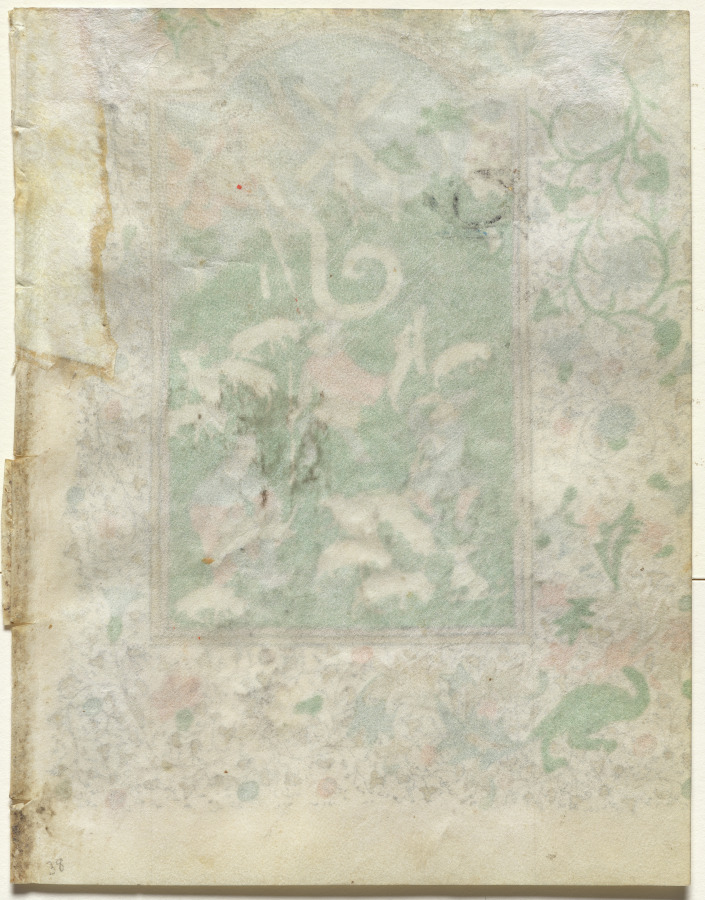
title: Annunciation to the Shepherds: Leaf from a Book of Hours (1 of 6 Excised Leaves)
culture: France, Metz, 15th century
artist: Henri d'Orquevaulx (French)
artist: or Workshop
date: c. 1420–30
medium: ink, tempera, and gold on vellum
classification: Manuscript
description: This leaf survives from what must have been an extraordinarily rich book of hours. The elaborate Passion cycle and Suffrages point to an important patron. Internal evidence within the original calendar and texts indicates that Metz was the probable place of production. Stylistically, the illuminations appear to come from the workshop of Henri d’Orquevaulx, a documented Metz manuscript painter. Compositionally, structurally, and stylistically, the miniatures suggest strong links to Netherlandish illumination. It is not known whether d’Orquevaulx came originally from the Netherlands or whether he simply worked or trained there at some point in his career.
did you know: Books of hours were devotional books popular in the Middle Ages and meant for laypeople, or those not in the clergy.